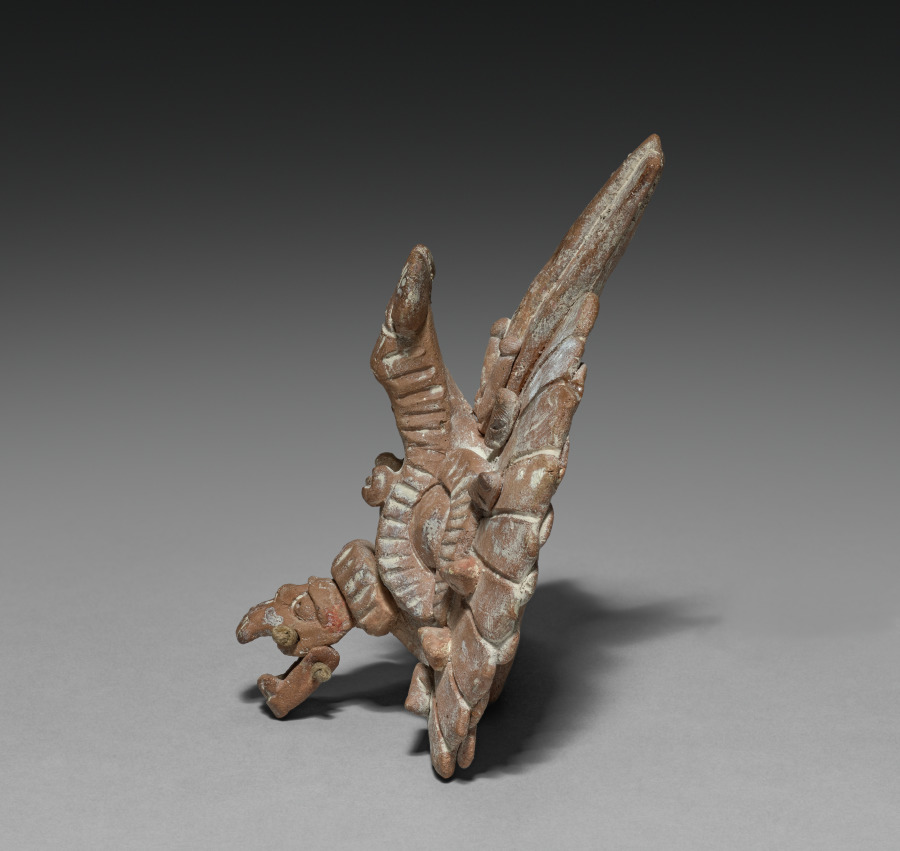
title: Seated Lord with Removable Headdress: Headdress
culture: Mesoamerica, Maya, probably Jaina Island, Late Classical period, 7th-9th century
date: 600–800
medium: ceramic and slip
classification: Ceramic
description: The major Maya grave offerings on Jaina Island were ceramic figurines that depict deities and humans in a variety of roles. The headdress belongs to a seated figure who represents a male, perhaps another warrior, who wears a huge zoomorphic headdress. A skeletal face with articulated jaw descends from the headdress to fit as a mask over the figure’s face.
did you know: It is estimated that some 20,000 people were buried on the tiny island of Jaina over a 500-year period.